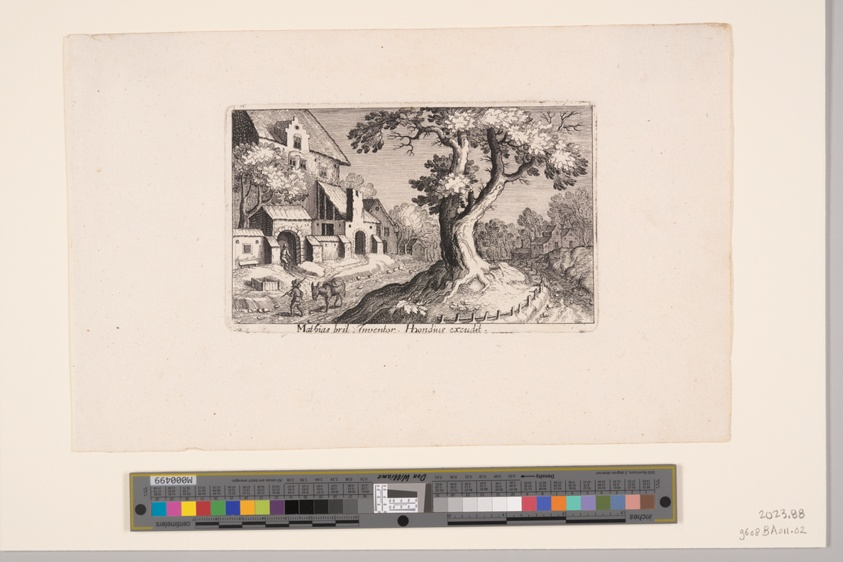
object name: Print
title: Man with a Donkey walking by a Village, from Topographia Variarum Regionum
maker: Simon Frisius (Dutch, c. 1580–1629); after Matthijs Bril (Flemish, 1550-1583)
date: 1614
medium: Etching on paper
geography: Netherlands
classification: etching; paper; print; prints and drawing